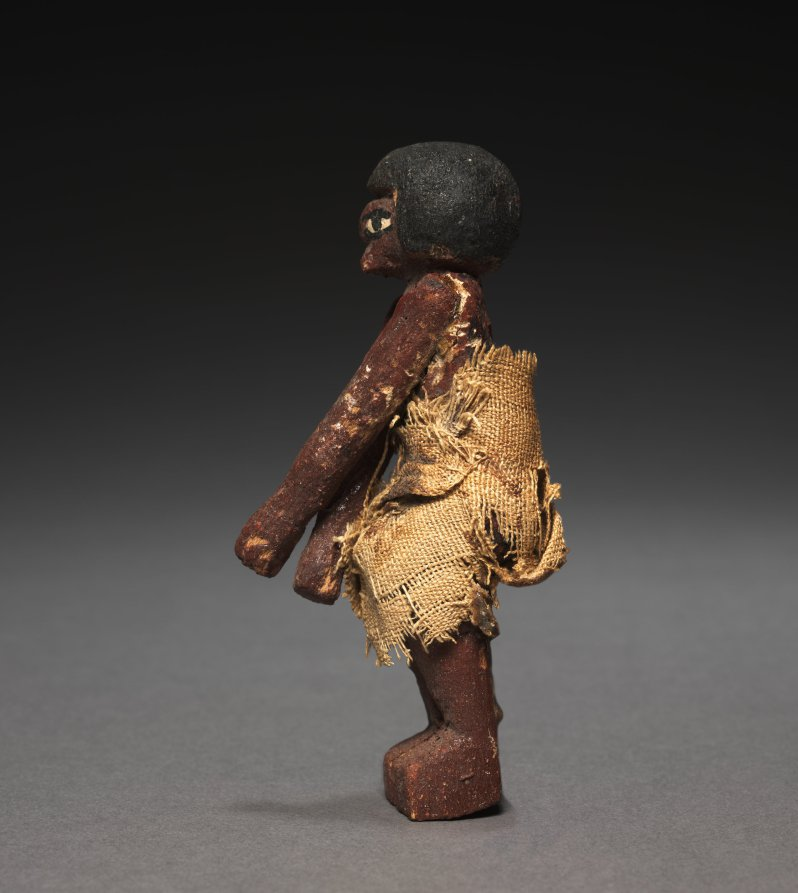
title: Seated Model Sailor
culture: Egypt, Middle Kingdom (2040–1648 BCE), Dynasties 11–12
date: 2000–1000 BCE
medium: painted sycamore fig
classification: Funerary Equipment